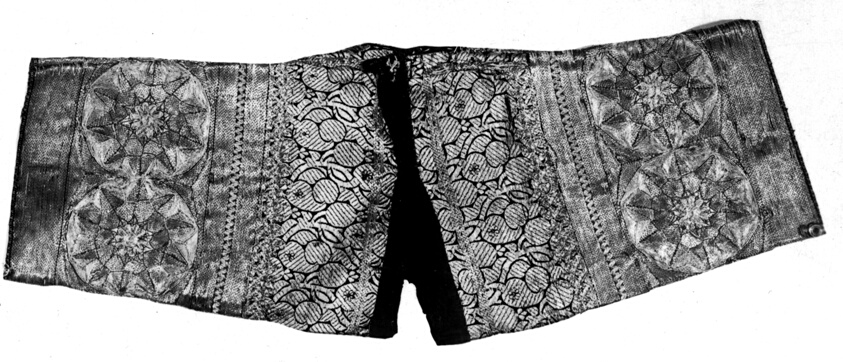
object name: Textile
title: Pair of Long Cuffs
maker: Eastern India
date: 19th century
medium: Couched gold thread needlework and bands of woven gold patterned blue silk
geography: India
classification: textile; costume; dress (garment); clothing